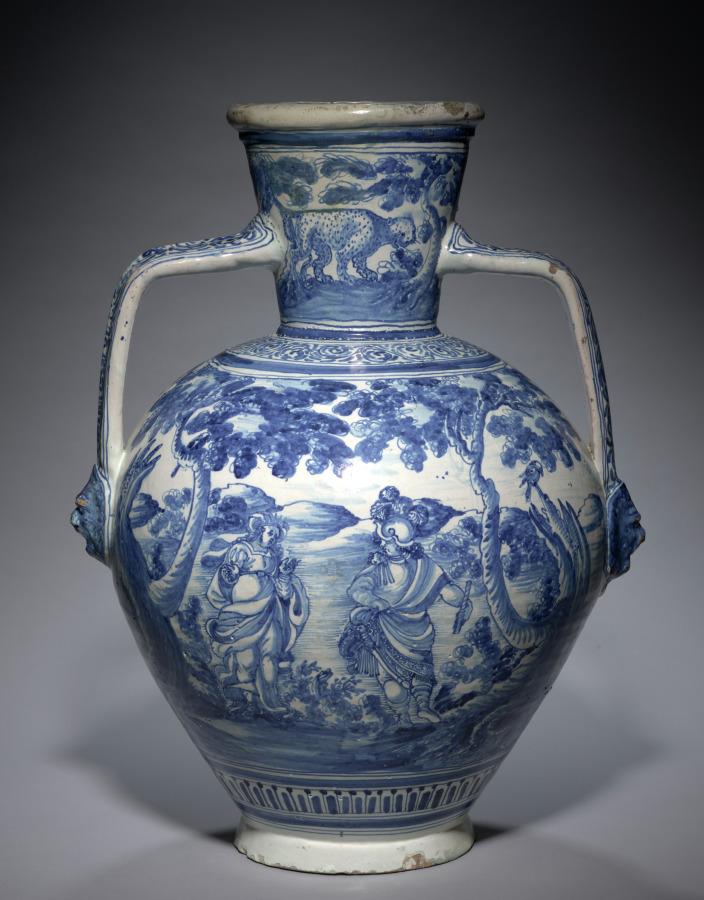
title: Two-Handled Jar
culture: Spain, Talavera, 17th century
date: early 1600s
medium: tin-glazed earthenware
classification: Ceramic